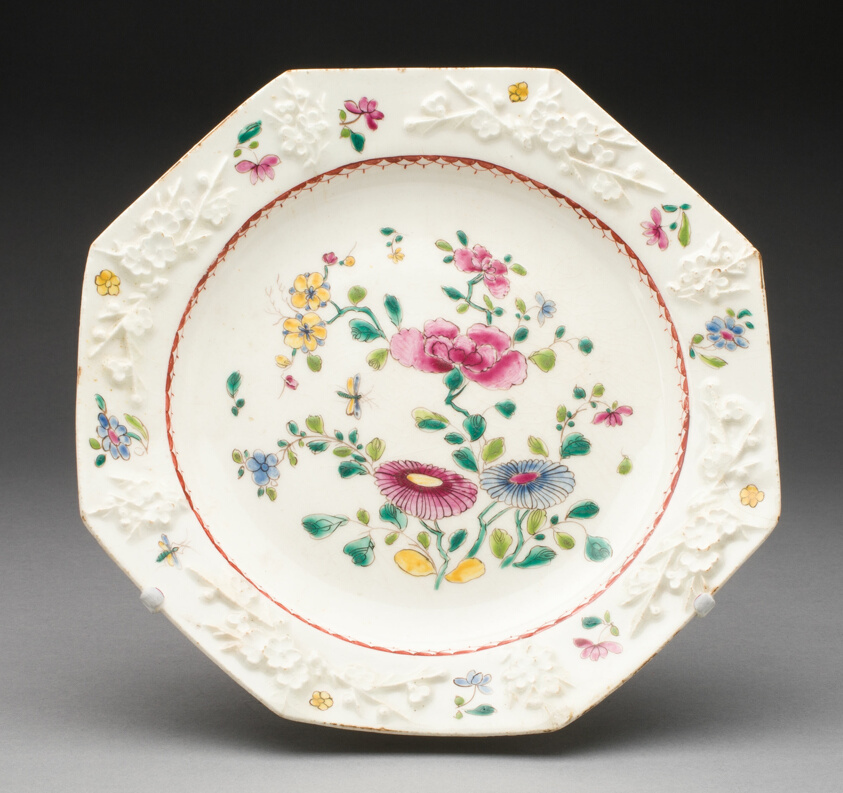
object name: Ceramics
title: Plate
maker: Bow Porcelain Factory (London, England, 1744-1775)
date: 1745/55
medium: Soft-paste porcelain, polychrome enamels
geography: Bow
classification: plate (general, dish); dish (vessel); porcelain; european decorative arts; ceramics